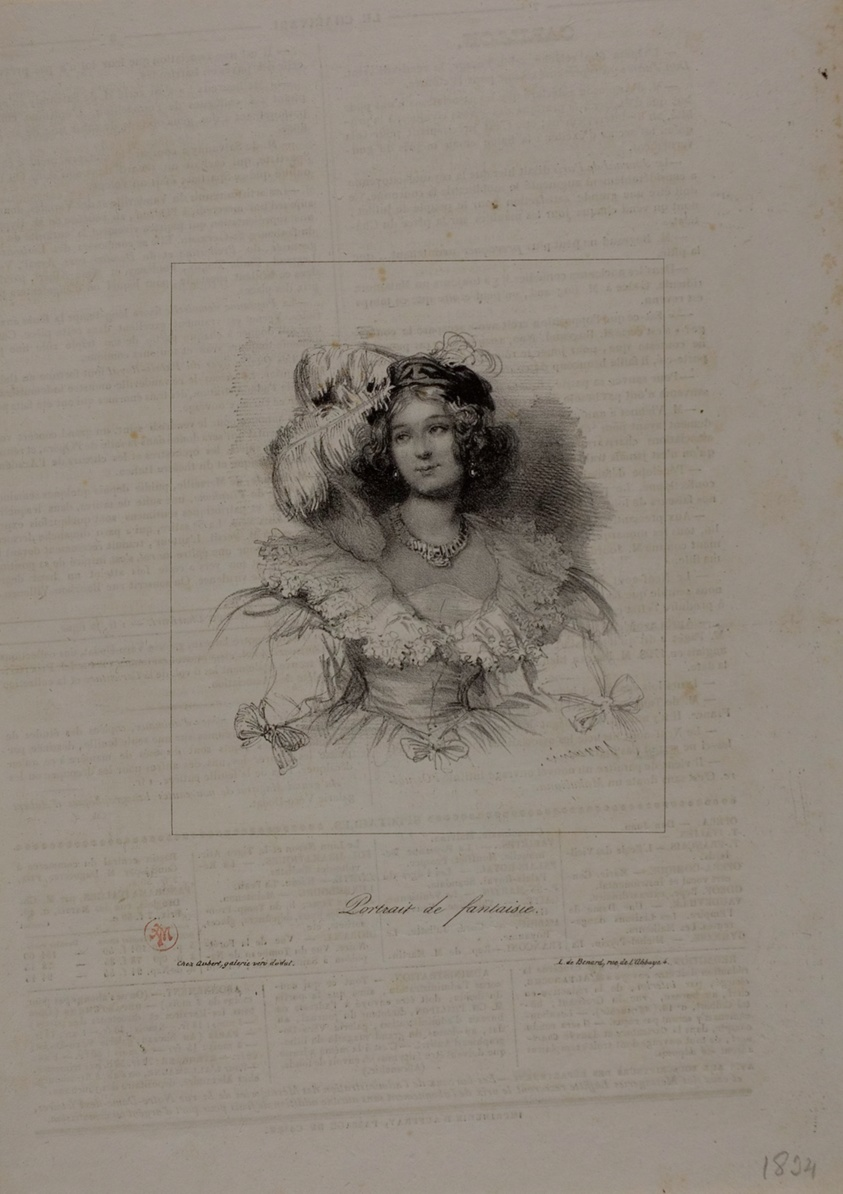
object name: Print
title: Fantasy Portrait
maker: Paul Gavarni (French, 1804-1866)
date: 1834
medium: Lithograph in black on ivory wove paper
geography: France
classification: lithograph; print; prints and drawing